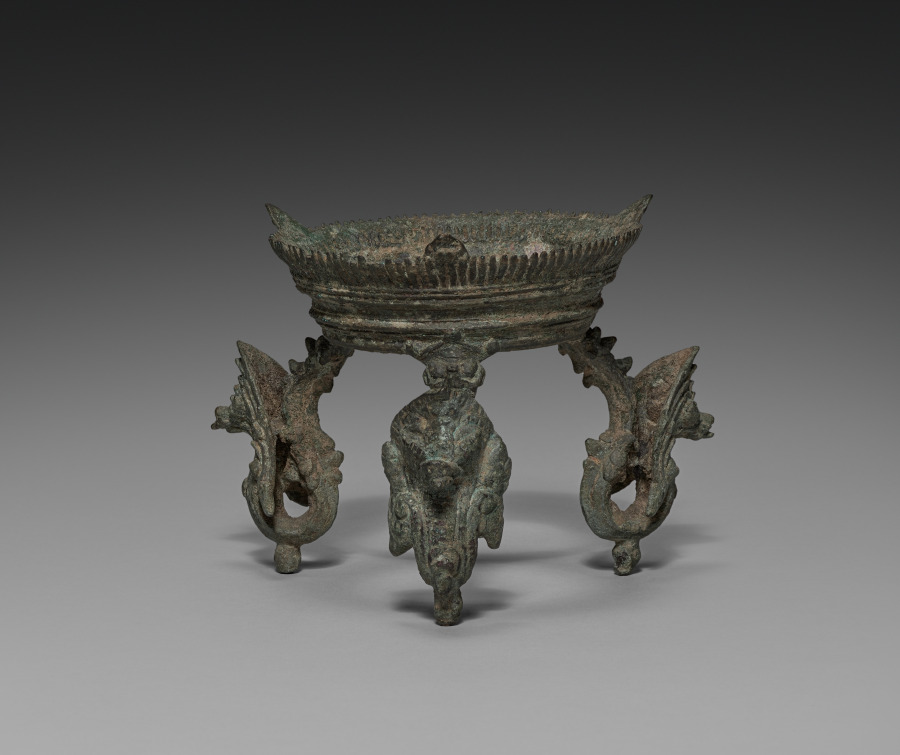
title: Tripod stand with nagas for a ritual conch shell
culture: Cambodia, Khmer, Angkor Period, 12th-13th Century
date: 1100s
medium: shell and bronze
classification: Sculpture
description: A royal temple like Banteay Chhmar was built for performing rituals and to honor images of gods, Buddhas, and other sacred or enlightened beings for the sake of the kingdom’s protection and ongoing prosperity. Conch shells were blown at the start of rituals to make the sound corresponding to the syllable om. The dancing figure of Hevajra, a Buddhist being of enlightenment with eight heads, sixteen arms, and four legs, has been worked into the bronze embellishment of the shell. Hevajra was elevated to a prominent position in Khmer Buddhism of the Angkorian period as the standard figure denoting the practice of rituals prescribed in a text called the Hevajra-tantra. The tripod stand with three serpents is probably not original to the shell.